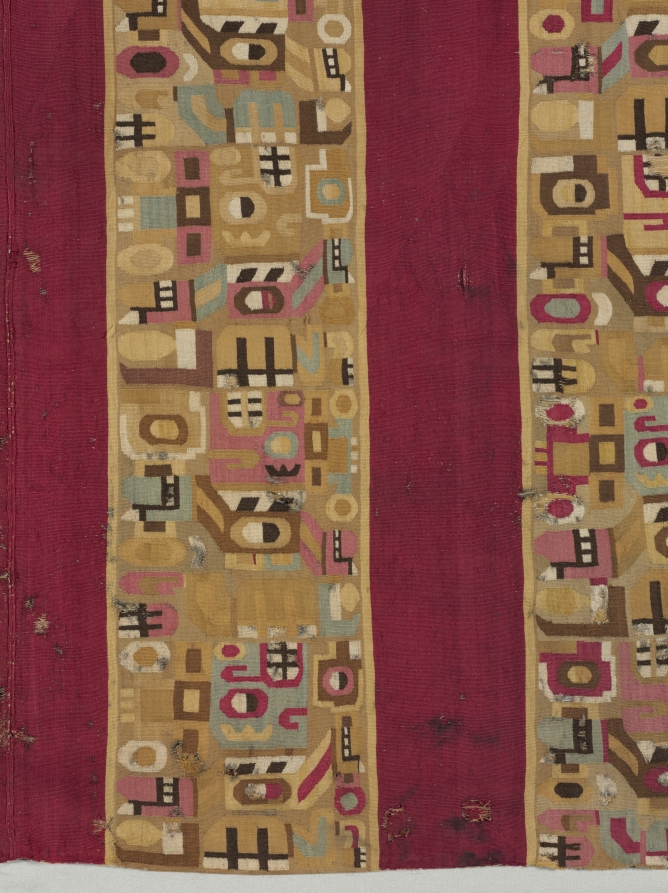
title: Tunic with Sacrificer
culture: South America, Peru, Central Andes, Middle Horizon, Wari people, 7th-11th century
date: 600–1000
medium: camelid-fiber, cotton; tapestry weave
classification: Textile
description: An extremely abstract supernatural sacrifice repeats in different colors and orientations across the body of this tunic, which was shortened on one side in antiquity. Look for the toothy black-and-white mouth in the sacrificer's upward-gazing head; other facial features include a button nose and a vertically divided eye. The figure holds the L-shaped haft of an axe behind its back and, at the front of its body, a short staff with a severed, upside-down human head on the top.